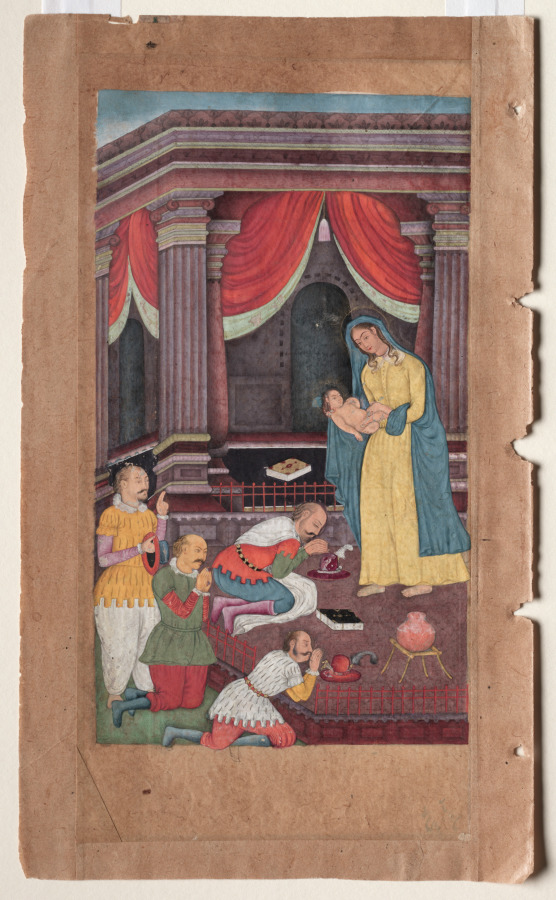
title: The Adoration of the Shepherds, from a Mirror of Holiness (Mir’at al-quds) of Father Jerome Xavier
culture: Mughal India, Allahabad, made for Prince Salim (1569–1627)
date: 1602–4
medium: Gum tempera, ink, and gold on paper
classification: Manuscript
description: Without reading the text, it would be difficult to identify the adorers as shepherds, because they are clothed as Portuguese merchants with ruffed collars and broad-brimmed hats. Mary stands with her divine newborn in a fenced enclosure, evocative of a sacred or royal space within a rather palatial setting, complete with pseudo-Ionic columns and heavy red draperies. The two books on the floor indicated to the Mughals that Christians, like Muslims, revere a definitive sacred scripture such as the Bible or the Koran.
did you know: The finishing details on this painting, such as two of the shepherds’ feet, the tile patterning, and probably arabesques, have not been completed.